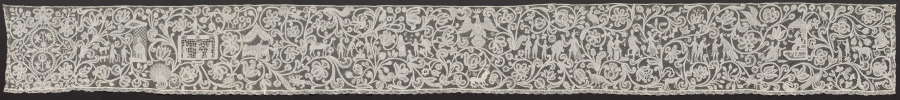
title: Lace Flounce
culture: Italy, Milan(?)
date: 1750–99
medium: Linen: bobbin lace (Punto di Milano)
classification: Lace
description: Being the most prestigious material, lace was used extensively by the 1600s for altar linen and for trimming priest’s albs, often incorporating finely rendered religious images amid blossoming vines. This alb flounce depicts scenes from the Old Testament story of Joseph, whose jealous brothers sold him to a caravan bound for Egypt. Joseph later interpreted dreams of the pharaoh, who made him ruler. When famine in Canaan caused Joseph’s ten brothers to travel to Egypt in search of food, they bowed down to him. After he revealed his identity, he forgave his brothers and God saved the family.